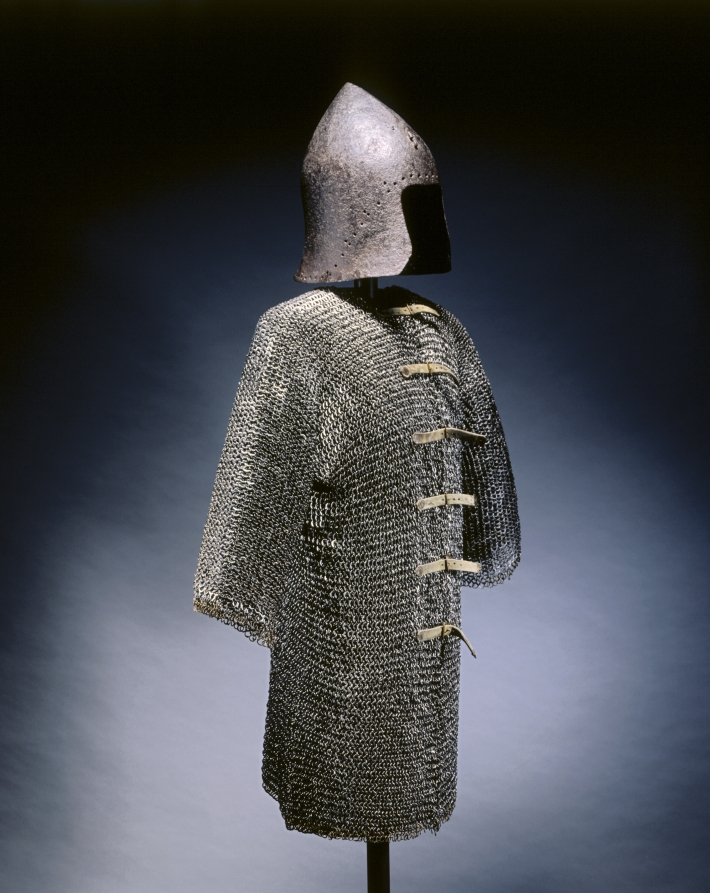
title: Hauberk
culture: Germany (?)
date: c. 1400–1450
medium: steel and brass rings, riveted with modern buckles and straps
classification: Arms and Armor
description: Mail armor was the predominant form of metal body defense for European knights until about 1350. The term derives from the Old French word maille (mesh), implying a protective textile. Each mail garment was constructed of small linked metal rings and "woven" for a specific part of the body. Mail for the torso is a hauberk and typically reached mid-thigh.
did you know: Mail was expensive to make and generally only available to warriors of noble birth unless it could be obtained as war booty.